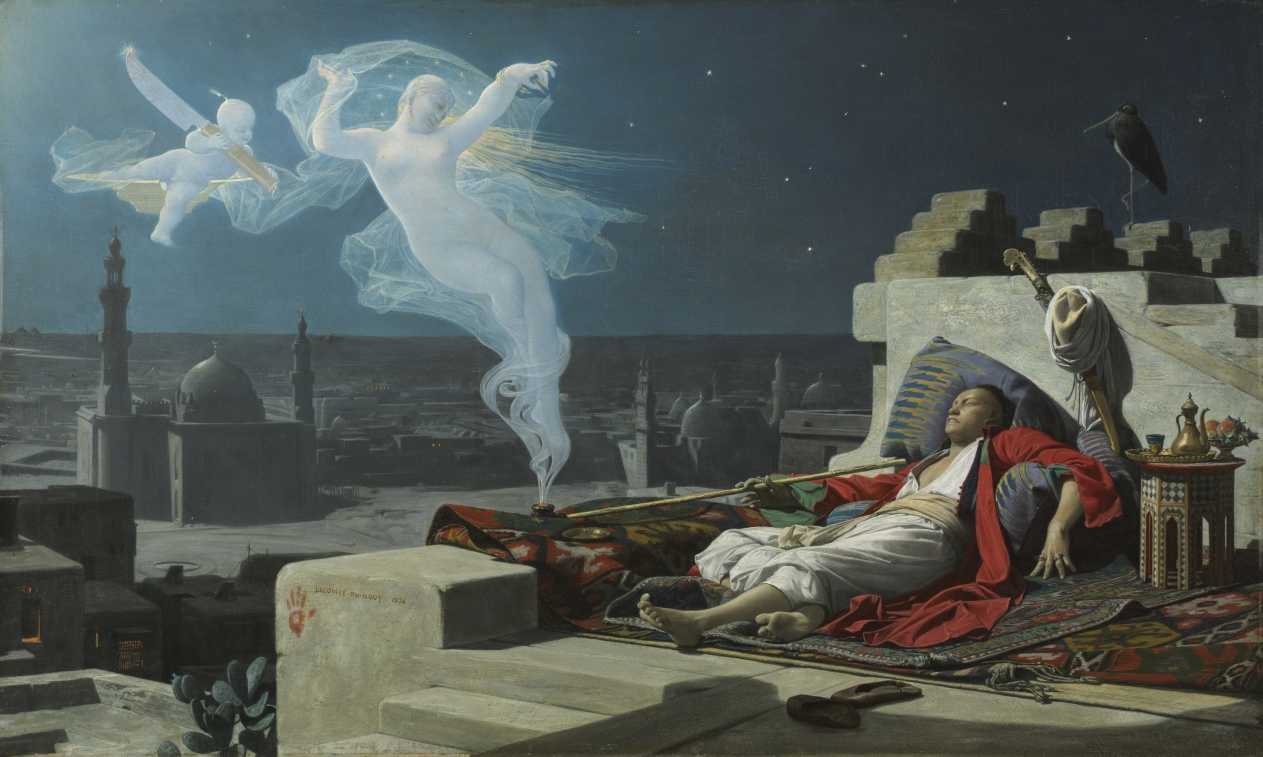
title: A Eunuch's Dream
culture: France, 19th century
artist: Jean Lecomte du Nouÿ (French, 1842–1923)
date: 1874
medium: oil on wood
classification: Painting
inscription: Signed center left: Lecomte du Nouÿ / 1874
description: This painting, inspired by Charles Montesquieu's Persian Letters (published in 1721), depicts a eunuch who wanted to marry a harem slave. He experienced a vision of her while smoking his opium pipe, but her little companion holding a knife dripping with blood reminds us that the eunuch's anatomy precludes the fulfillment of his dream. The outline of a hand next to the signature is a khamsa, a symbol used to ward off evil.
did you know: Much of Jean Lecomte du Nouÿ's artwork was inspired by travelling to Egypt as a young man.